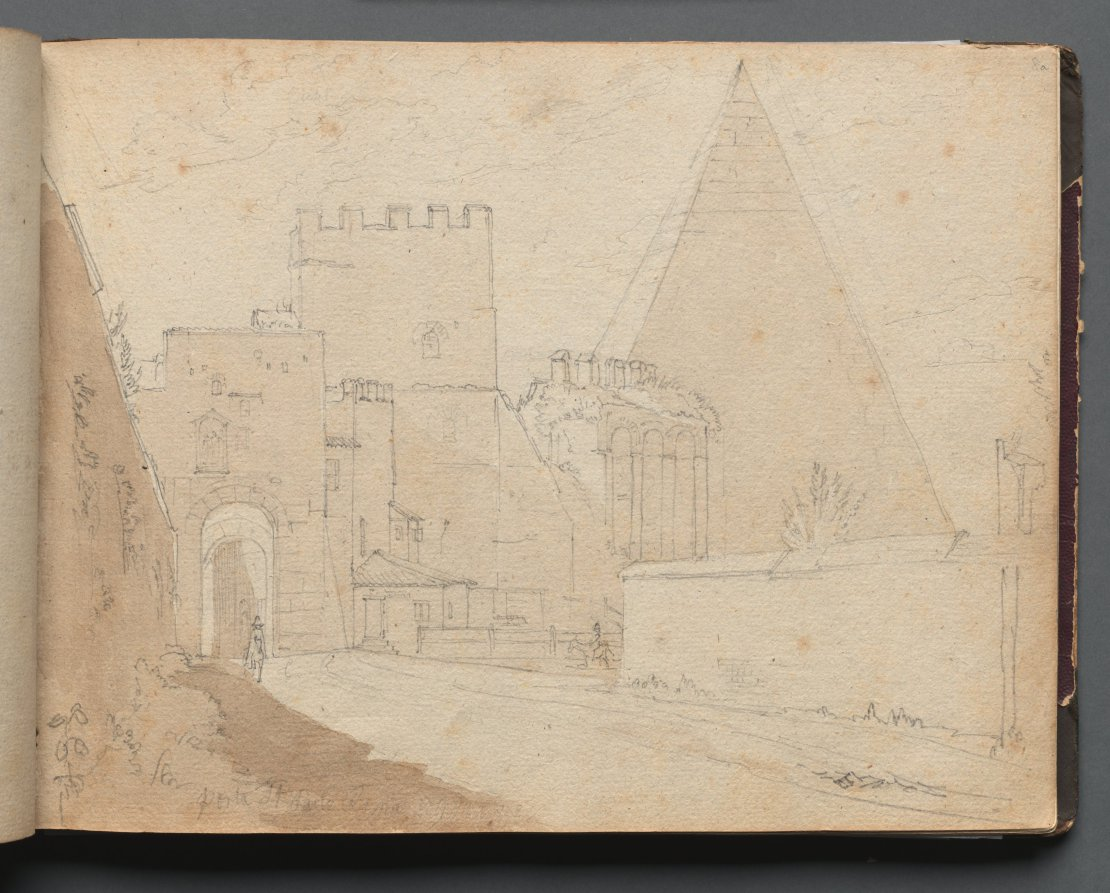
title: Album with Views of Rome and Surroundings, Landscape Studies, page 08a: "Porta St. Paolo"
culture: Germany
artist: Franz Johann Heinrich Nadorp (German, 1794–1876)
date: c. 1830s-70s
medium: graphite with brown wash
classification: Bound Volume